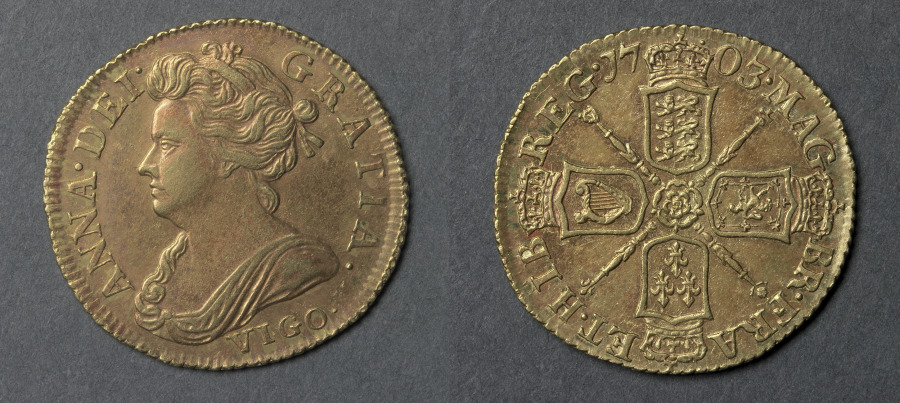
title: Half Guinea: Anne (obverse); Shields and Rose (reverse)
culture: England, Anne, 1702-1714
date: 1703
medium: gold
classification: Coins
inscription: ANNA.DEI. GRATIA VIGO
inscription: MAG BR. FRA ET. HIB REG 1703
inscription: DECUS ET TUTAMEN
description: The coinage of Anne's reign remained fairly constant after the inaugural design in 1662. Before the Act of Union with Scotland (1706), the arms of England and Scotland remained separate, as shown. After the act the two arms were conjoined on one shield. The word Vigo indicates the coins were struck from gold captured from the Spanish at the Battle of Vigo Bay (1702). Although silver coins bearing the Vigo inscription are less rare, the three gold denominations bearing the symbol are all extremely rare.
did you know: The Battle of Vigo Bay occurred on October 23, 1702. After the battle the treasure, largely of silver with a tiny amount of gold, was transported back to England and coins were made bearing the inscription Vigo.